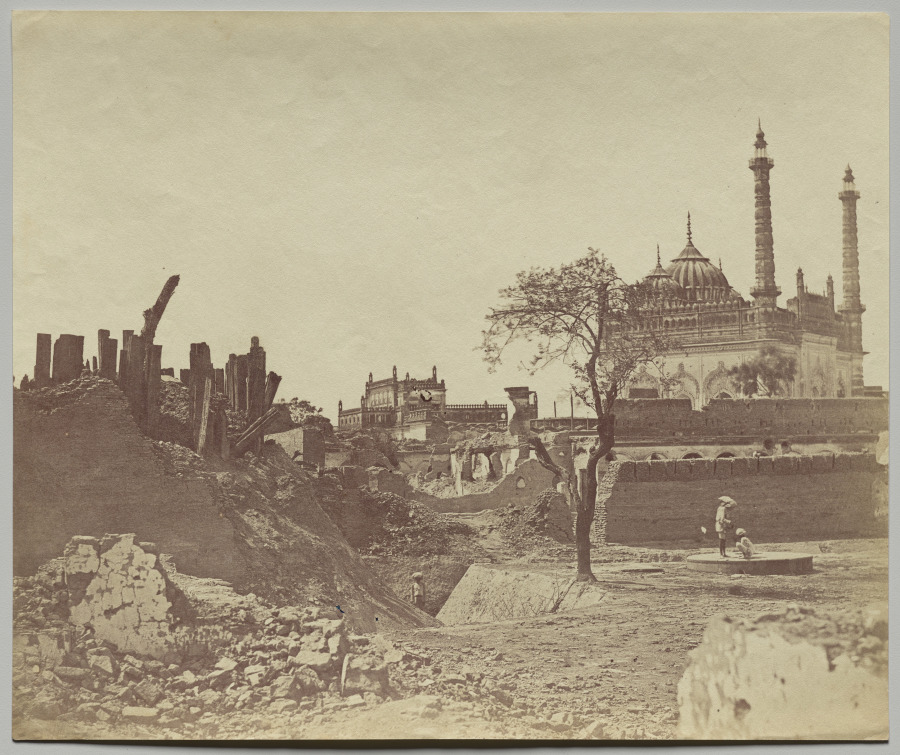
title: Battery Near the Begum Kotie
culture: England, 19th century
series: Lucknow After the Siege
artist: Felice A. Beato (British, 1832–1909)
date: 1858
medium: albumen print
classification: Photograph